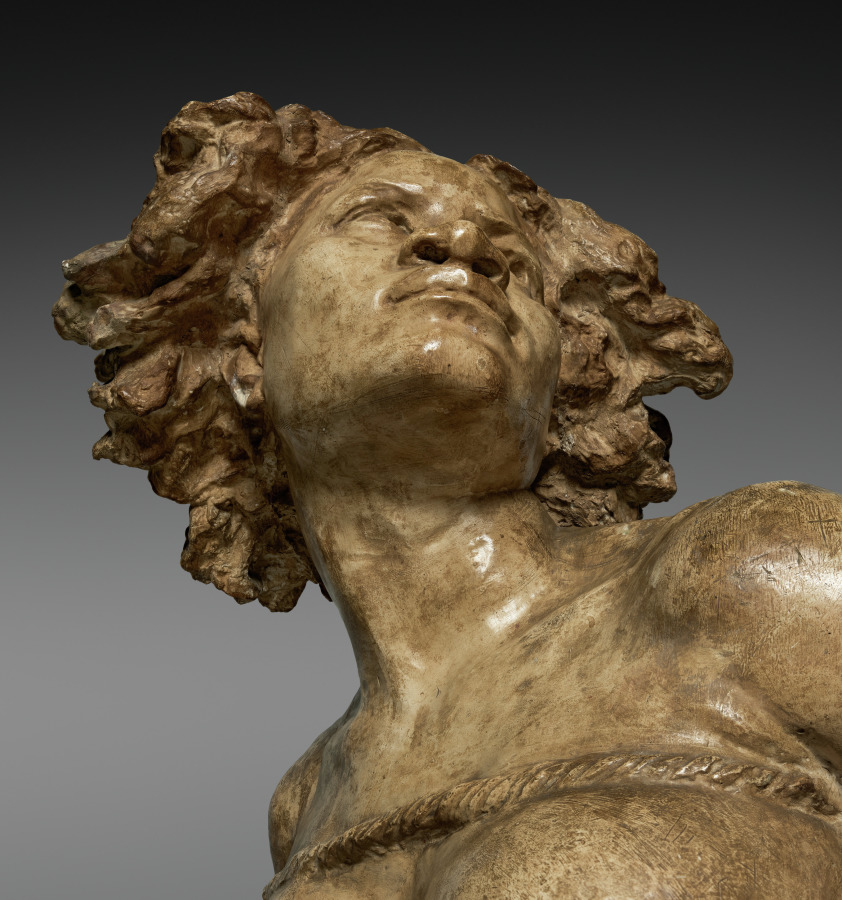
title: Why Born Enslaved!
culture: France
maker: Jean-Baptiste Carpeaux (French, 1827–1875)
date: 1867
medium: Plaster, original polychromed surface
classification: Sculpture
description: One of the most powerful expressions of abolitionist sentiment in the visual arts, Why Born Enslaved! depicts an African woman bound by ropes and looking defiantly upward. The ropes press painfully into her breasts; her torn blouse alludes to the violence responsible for her condition. The original, polychromed surface is covered with complex, nuanced hatchings and subtle modeling. Evidence indicates that this masterpiece of 19th-century French sculpture served as the master model for numerous casts in other museum collections.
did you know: Although officially abolished in France since 1848, slavery remained a hotly contested issue in Carpeaux’s time as it remained legal or tolerated in various countries around the world.